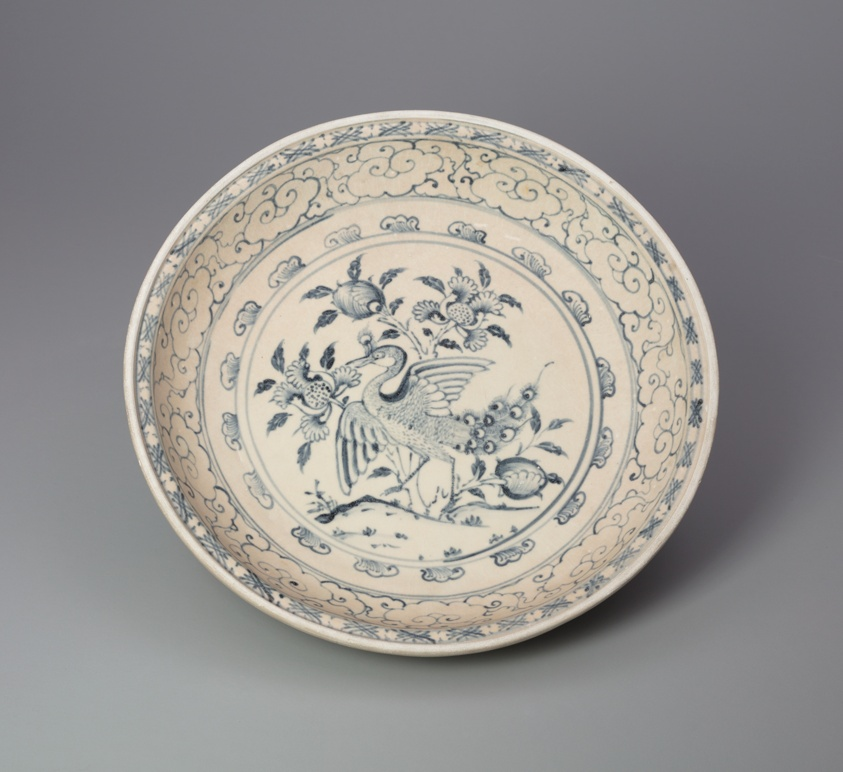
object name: Ceramics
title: Dish with Peacock and Floral Motif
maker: Vietnam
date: 15th century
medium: Glazed stoneware with cobalt-blue underglaze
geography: Vietnam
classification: porcelain; ceramics; asian art